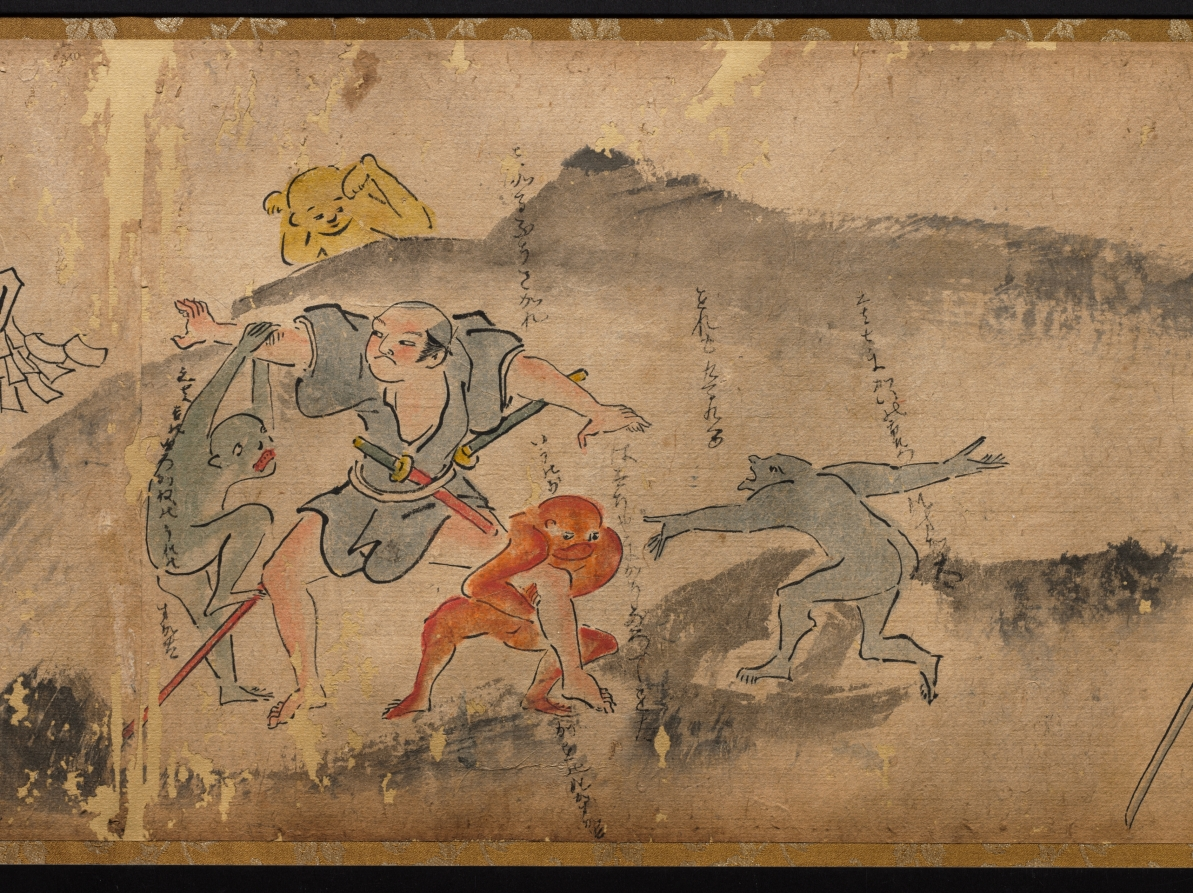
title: The Illustrated Tale of Oishi Hyōroku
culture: Japan, Edo period (1615–1868)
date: 1700s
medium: handscroll; ink and color on paper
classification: Painting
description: This incomplete handscroll illustrates part of the story of Oishi Hyoroku, a young man tasked with battling fox apparitions who were creating problems in his town. In other extant versions of the scroll, the story is set in the fall of 1624 in Kagoshima in southern Japan. Throughout the story, Hyoroku is tricked and terrified by the foxes that shift their shapes into a variety of monstrous phantoms. After repeated humiliations, he eventually captures two of the foxes. In this version, colloquial texts that function like text blurbs in comics appear throughout the scroll, but the main text is missing.